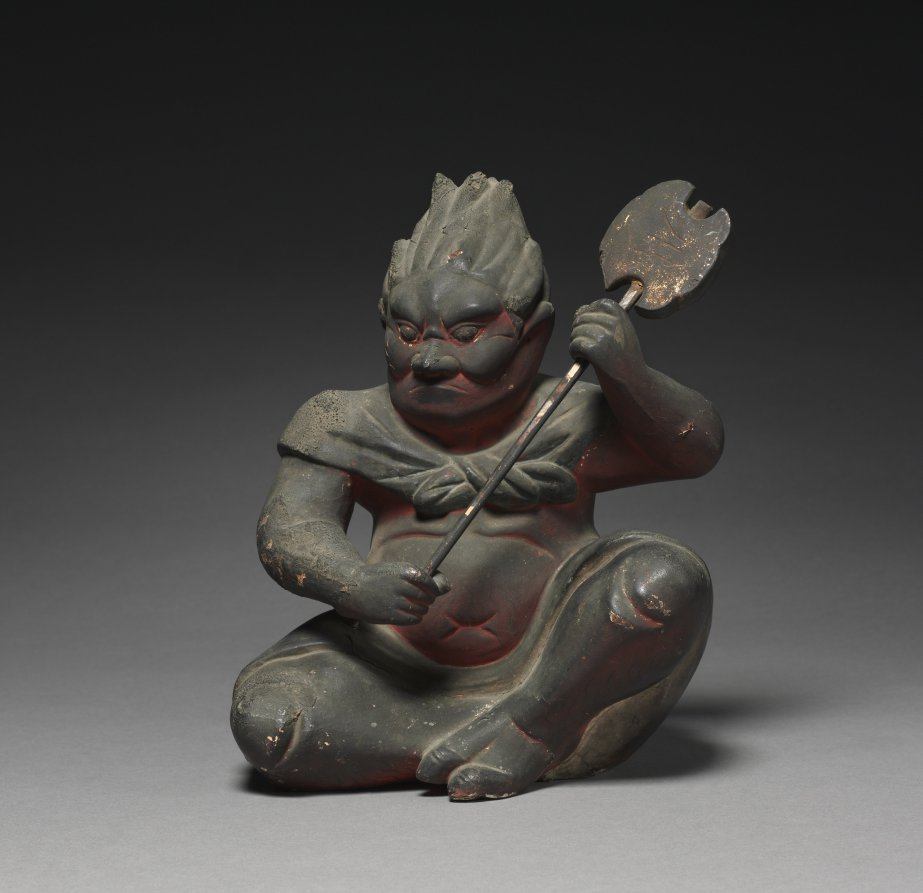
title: Seated Zenki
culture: Japan, Muromachi period (1392–1573)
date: 1400s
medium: wood with pigment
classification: Sculpture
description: The axe-wielding red Zenki, and the vase-holding, bamboo backpack-wearing green Koki are both under the mystical control of the monk, En no Ozunu (legendarily 634–701), also known as En no Gyōja, or “En the Ascetic,” considered to have founded Shugendō, a style of religious practice focused on performing austerities in mountainous settings.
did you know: A popular Japanese comic named Zenki was inspired by the figure seen here wielding a weapon.